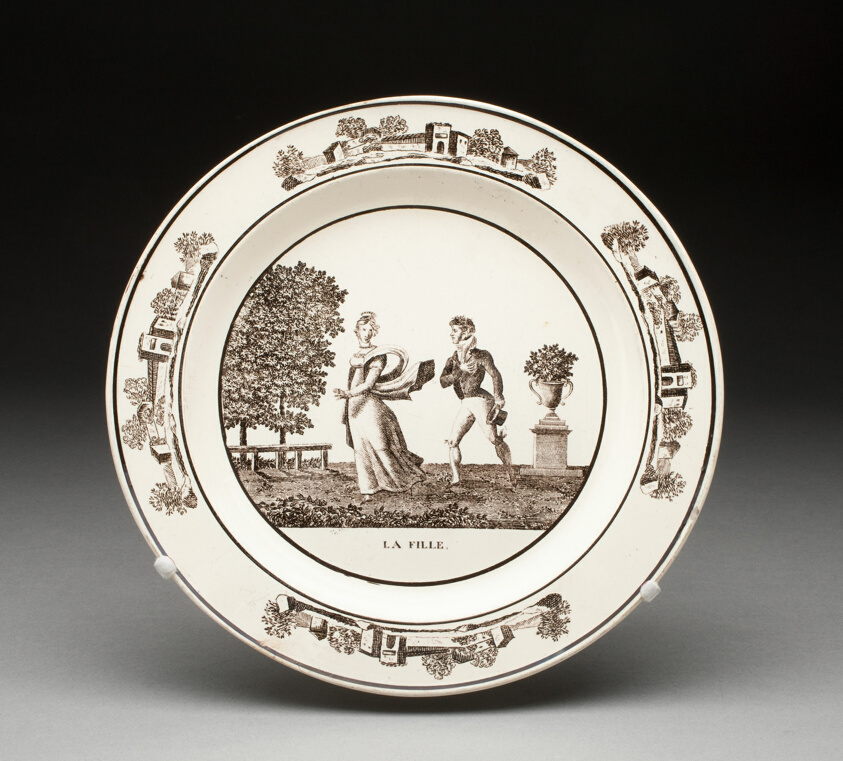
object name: Ceramics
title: Plate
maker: Montereau Pottery (French, 1774-1840)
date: 1800/25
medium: Earthenware, transfer-printed (creamware)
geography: Montereau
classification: plate (general, dish); earthenware; dish (vessel); european decorative arts; ceramics; creamware